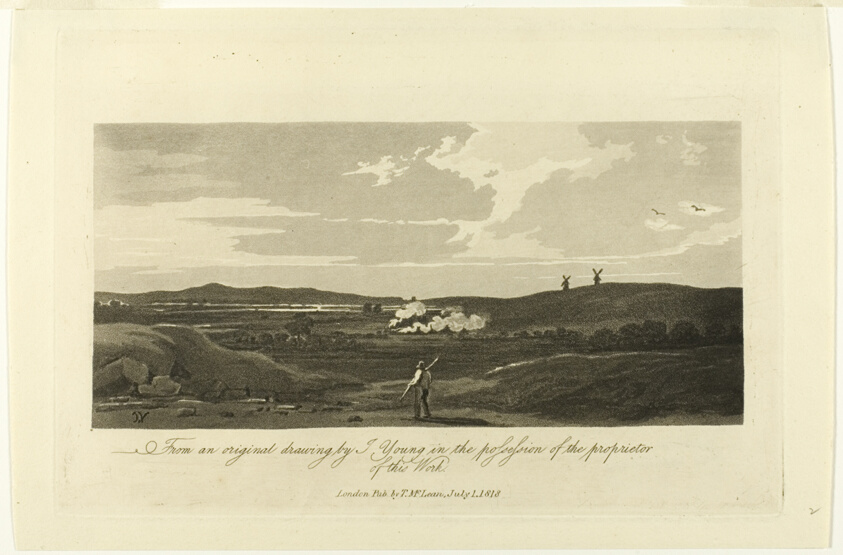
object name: Print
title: Landscape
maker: Unknown Artist (probably British, 19th century); after J. Young (British, active 19th century)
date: published July 1, 1818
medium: Aquatint and etching in black on cream wove paper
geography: England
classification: aquatint; print; prints and drawing